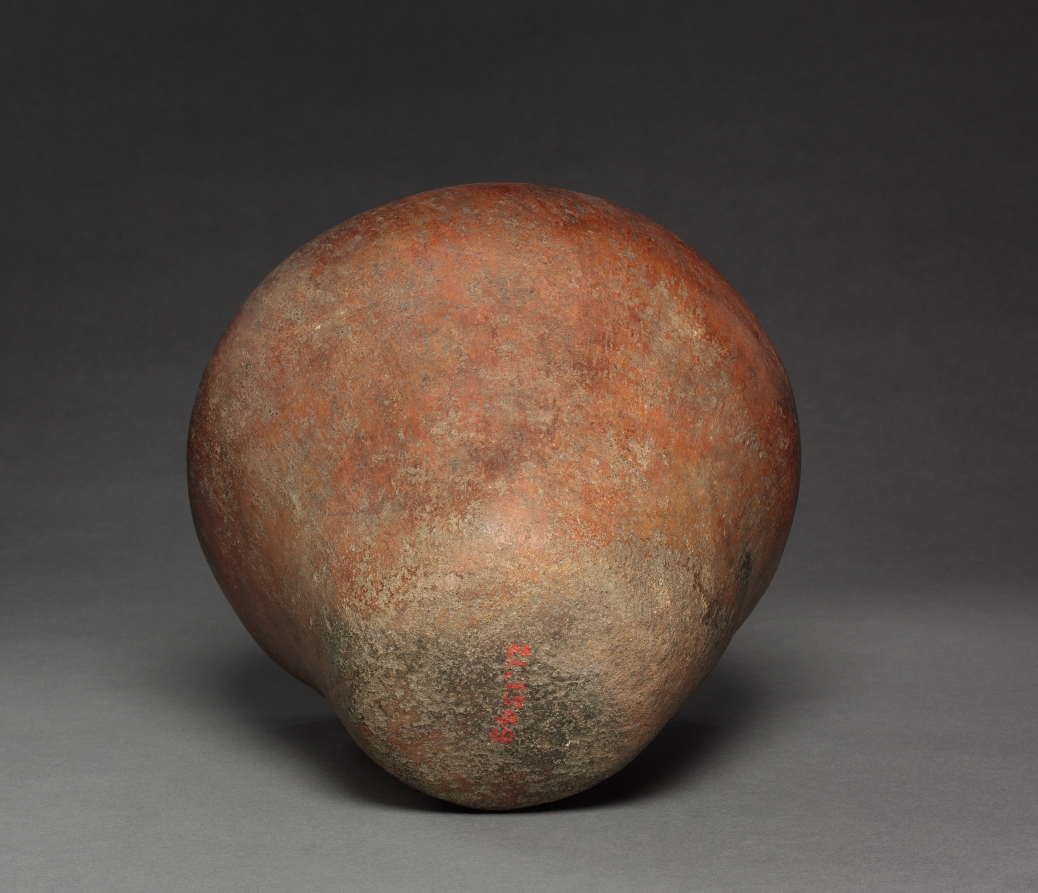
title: Vase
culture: Colombia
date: before 1921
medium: pottery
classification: Ceramic